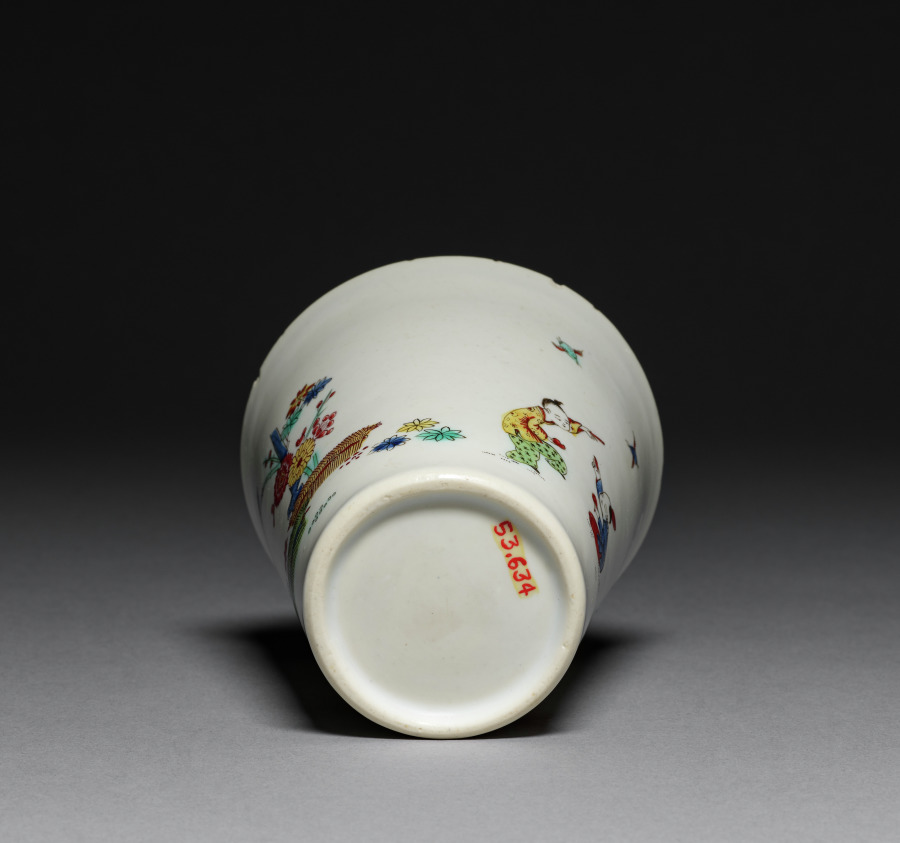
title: Beaker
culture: France, Mennecy, 18th century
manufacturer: Mennecy- Villeroy Factory (French)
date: 1725–1750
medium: soft-paste porcelain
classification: Ceramic